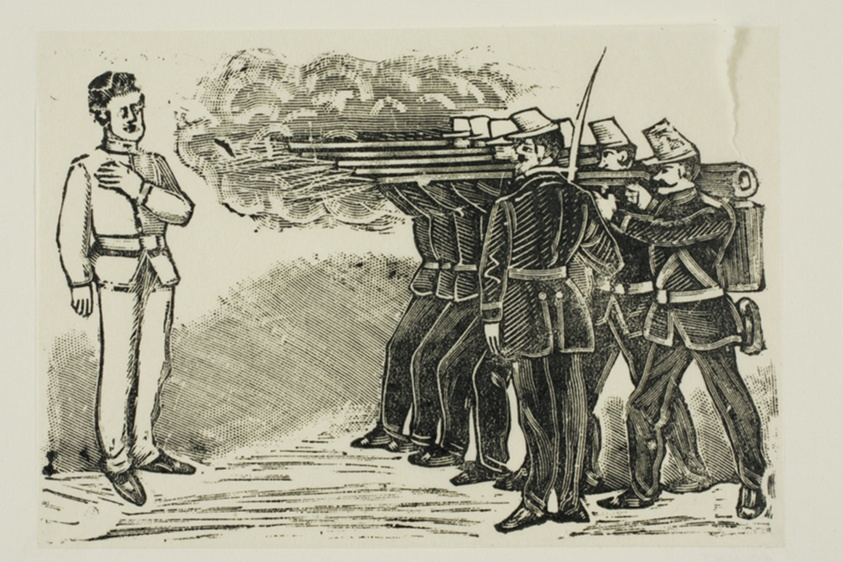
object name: Print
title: Execution by Firing Squad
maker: José Guadalupe Posada (Mexican, 1852-1913)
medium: Relief engraving on typemetal on paper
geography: Mexico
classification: relief etching; print; prints and drawing